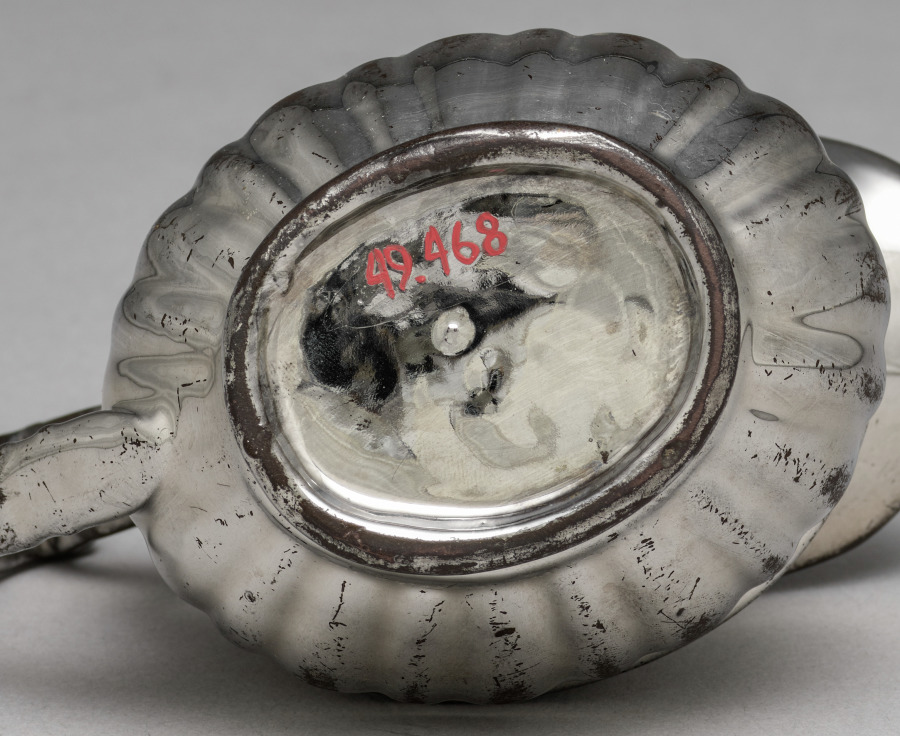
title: Silver Lustre Creamer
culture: England, 19th century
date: 1800s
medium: lustreware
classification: Ceramic